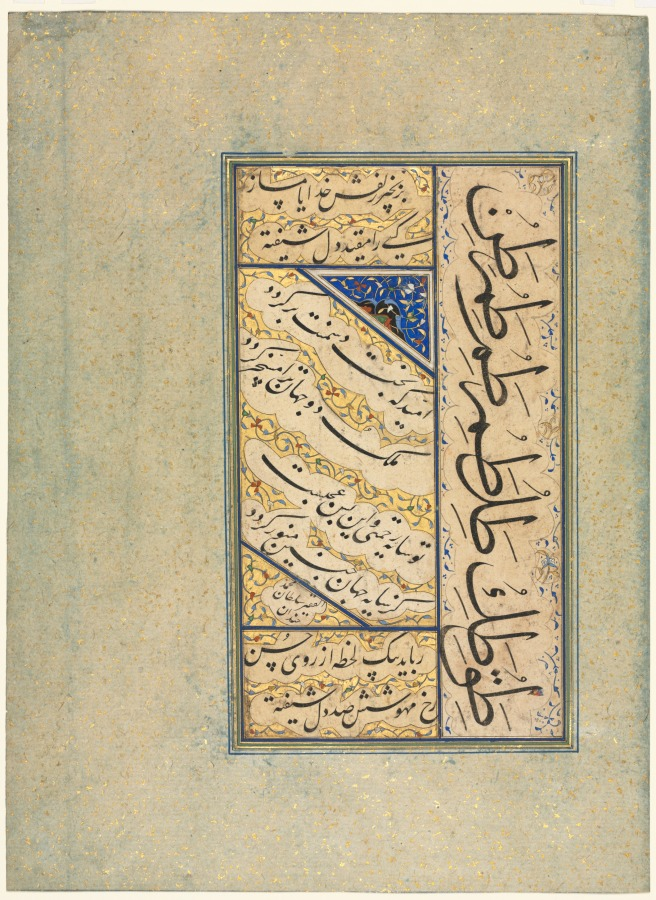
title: Persian Quatrains (Rubayi) and Calligraphic Exercises (recto); Persian Verse (khamriyya) (verso)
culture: Afghanistan, Herat, Safavid period (1501–1722)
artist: Sultan Muhammad Khandan (Iranian, d. after 1550)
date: c. 1509–50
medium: ink, gold, and opaque watercolor on paper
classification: Manuscript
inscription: [Persian quatrain]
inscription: [Persian quatrain]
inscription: Al-faqīr Sulṭān Muḥammad Khandān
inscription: [Persian khamriyya]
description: This page contains two quatrains—poems made up of four lines. The diagonally written text in the center of the page is a poem addressed to a ruler, expressing hope for his success and the downfall of his enemies. The second poem is split between the horizontal panels at the top and bottom of the page. This quatrain praises the beauty of the writer’s beloved, saying that “her moonlike face can steal away a hundred besotted hearts.” At the right are calligraphic exercises displaying letters of the alphabet and the virtuoso skill of the calligrapher Sultan Muhammad Khandan, who signed the page in the triangle at the lower left of the inner text block.